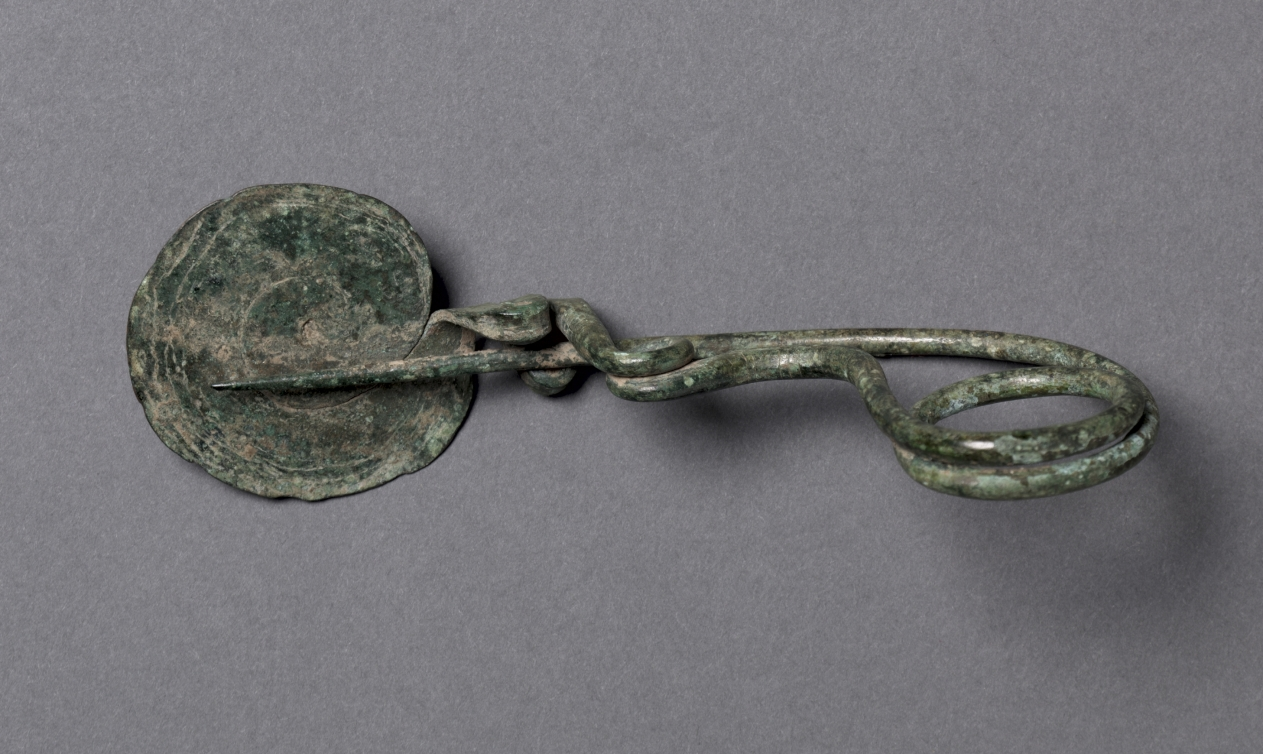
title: Coil or Serpentine Fibula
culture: Etruscan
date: 900–700 BCE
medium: bronze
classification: Jewelry